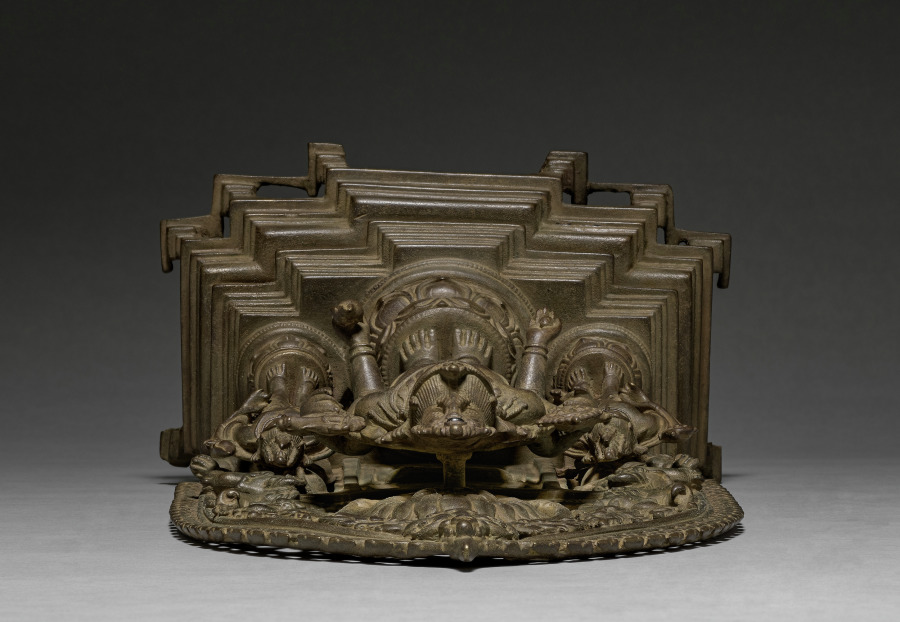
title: Vishnu Attended by Chakrapurusa and Shankhapurusa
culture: East India, Bengal, Pala period, 11th-12th century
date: 1000s–1100s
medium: bronze with silver inlay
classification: Sculpture